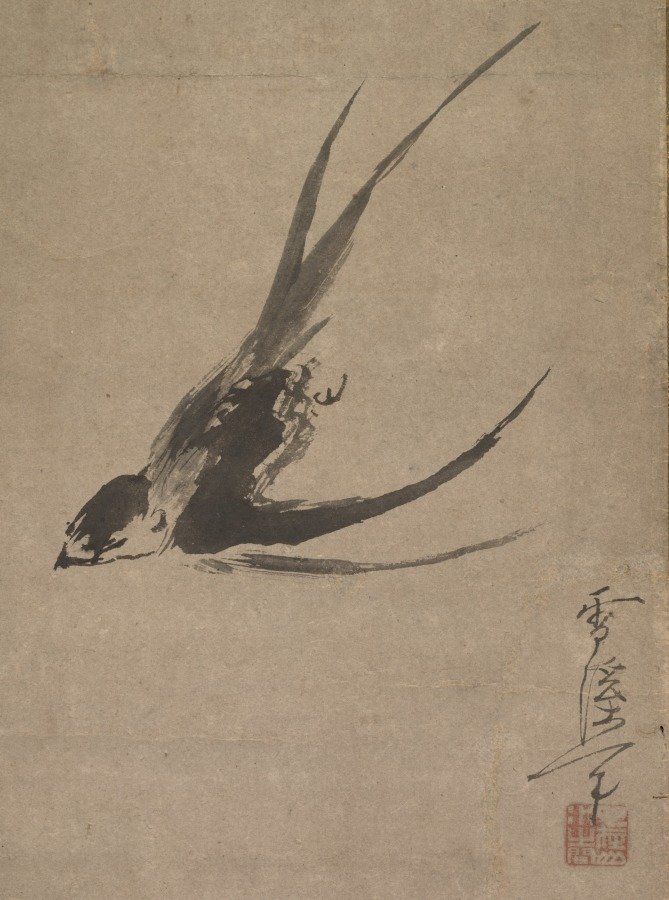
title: Swallows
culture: Japan, Edo period (1615–1868)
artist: Yamaguchi Sekkei (Japanese, 1644–1732)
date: late 1600s–early 1700s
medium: hanging scroll; ink and color on paper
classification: Painting